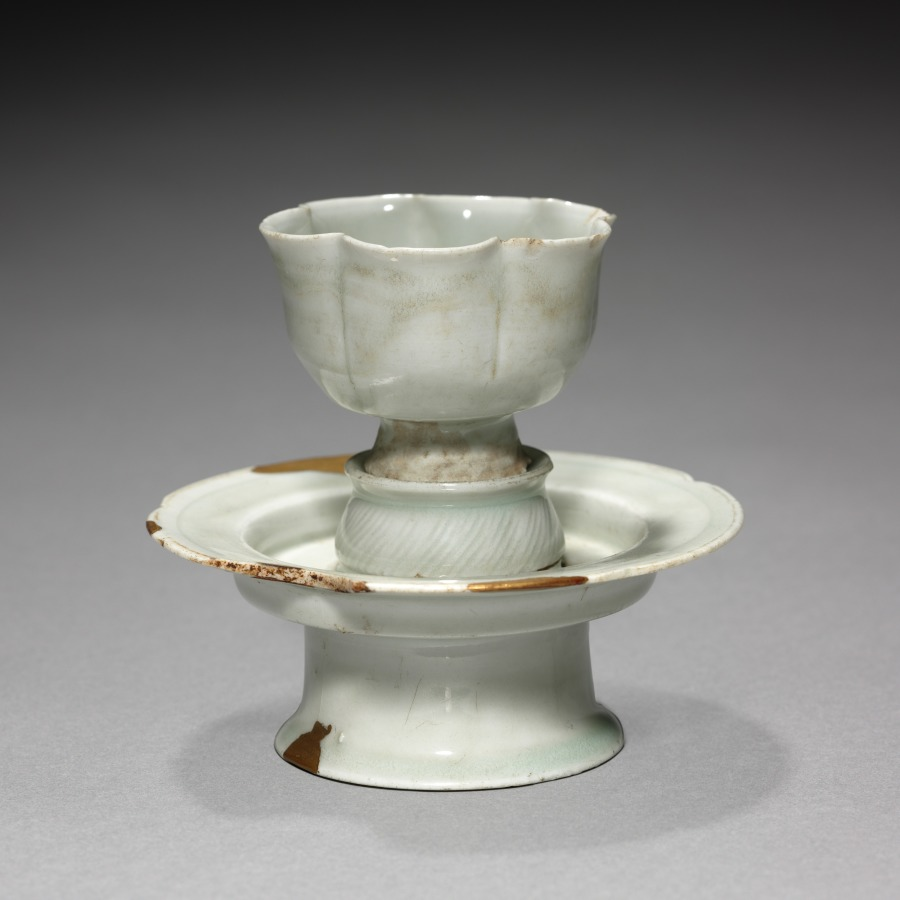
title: Cup and Stand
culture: Korea, Goryeo dynasty (918–1392)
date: 900s-1100s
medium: pottery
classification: Ceramic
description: As early as the seventh century, the practice of drinking tea and wine became an important part of elite culture in Korea. Elites of the Goryeo period commissioned a variety of types of utensils and vessels including this delicate-looking cup and cup stand, not only to make their drinking experience more exciting, but also to show their refined taste.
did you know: Many types of sophisticated stoneware examples such as this cup and cup stand were buried in the tombs of ruling class of the Goryeo dynasty (918–1392).